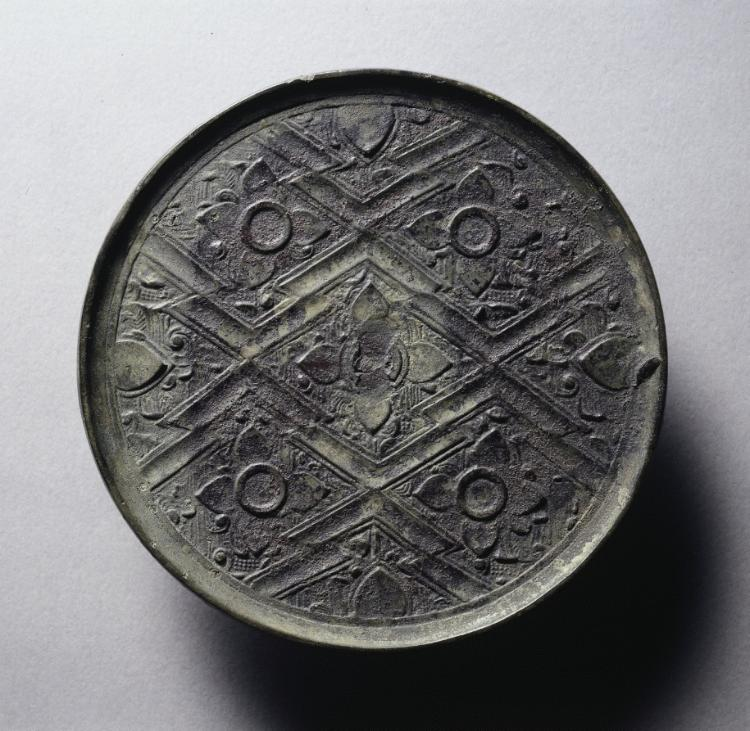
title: Mirror with Five Blossoms and Overlapping Lozenges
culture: China, Eastern Zhou dynasty (770–256 BCE), Warring States period (475–221 BCE)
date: 300s BCE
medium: bronze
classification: Metalwork